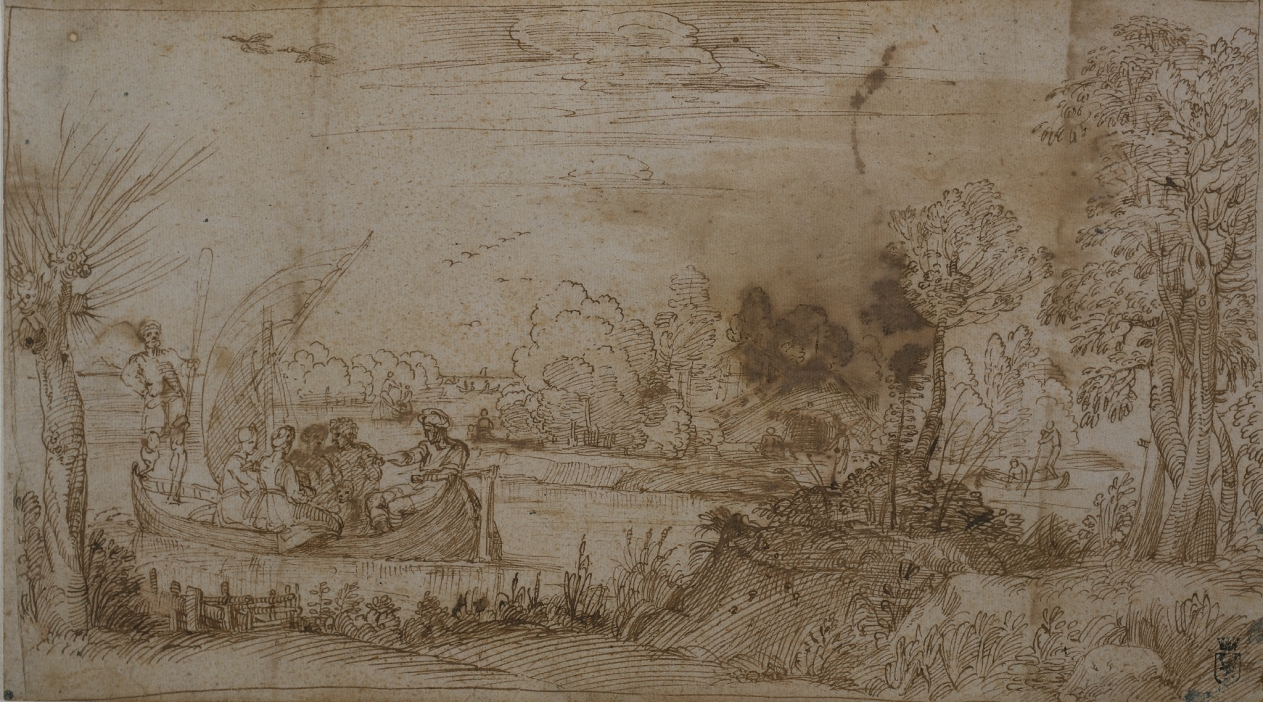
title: River Landscape with Boats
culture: Italy, 16th century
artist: Annibale Carracci (Italian, c. 1560–1609)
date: c. 1590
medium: pen and brown ink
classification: Drawing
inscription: SECONDARY SUPPORT (now removed), in black ink: 77 [crossed out]. 91 Agostino Carracci . A Landscape with a river & boats one full of company [last four words inserted] : executed with a pen. Size 8"3/4 x 16"3/4 [crossed out] / From the Collections of M. Mariette & Sir Thomas Lawrence .